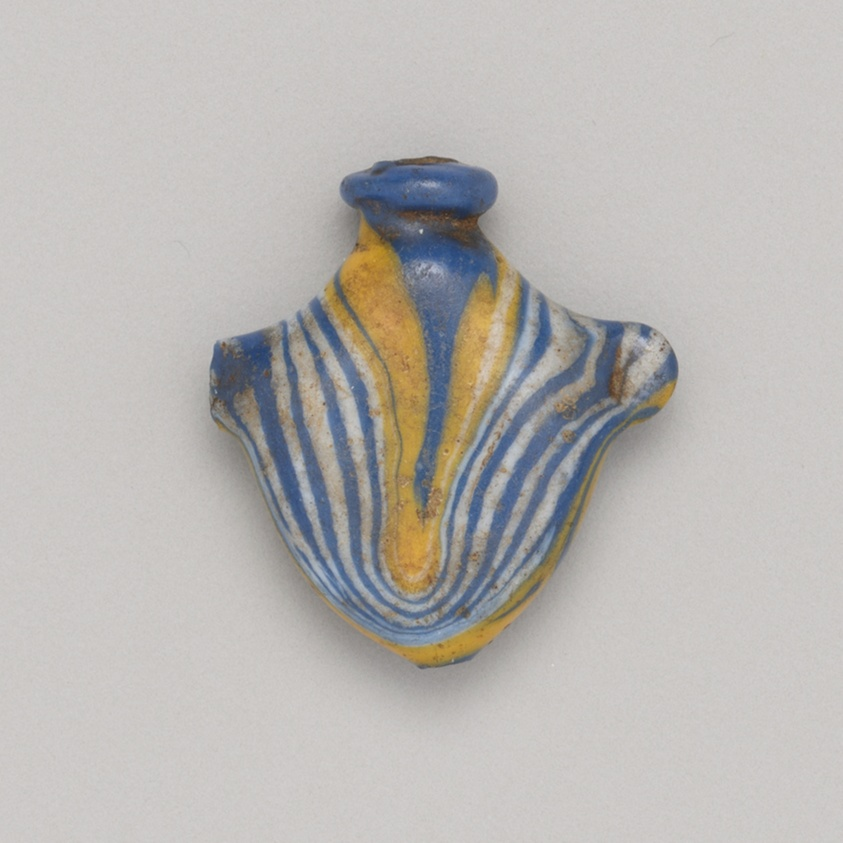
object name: Costume and Accessories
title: Amulet of a Heart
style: eighteenth dynasty, new kingdom, egyptian, ancient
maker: Egyptian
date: New Kingdom, Dynasty 18 (about 1550–1295 BCE)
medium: Glass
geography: Egypt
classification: amulet; bead; jewelry; ancient art; costume